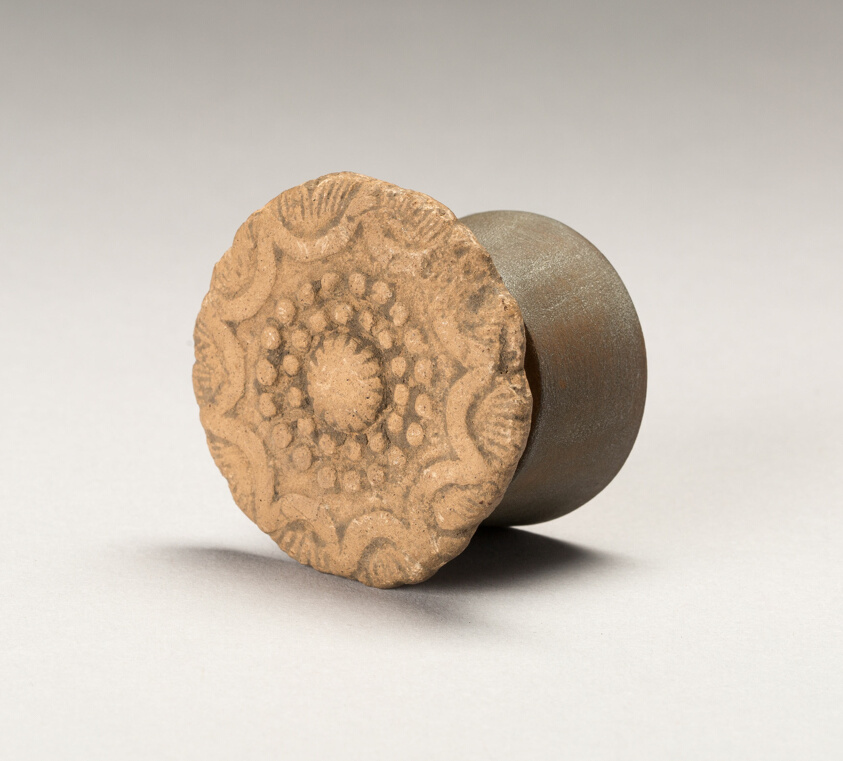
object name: Costume and Accessories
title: Earflare with Flower-like Modeled Relief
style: aztec, mesoamerican, Pre-Columbian, americas, Arts of the Americas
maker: Aztec (Mexica) (Valley of Mexico, Mexico)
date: 1450–1521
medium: Ceramic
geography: Valley of Mexico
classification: earthenware; ceramics; jewelry; art of the americas; costume